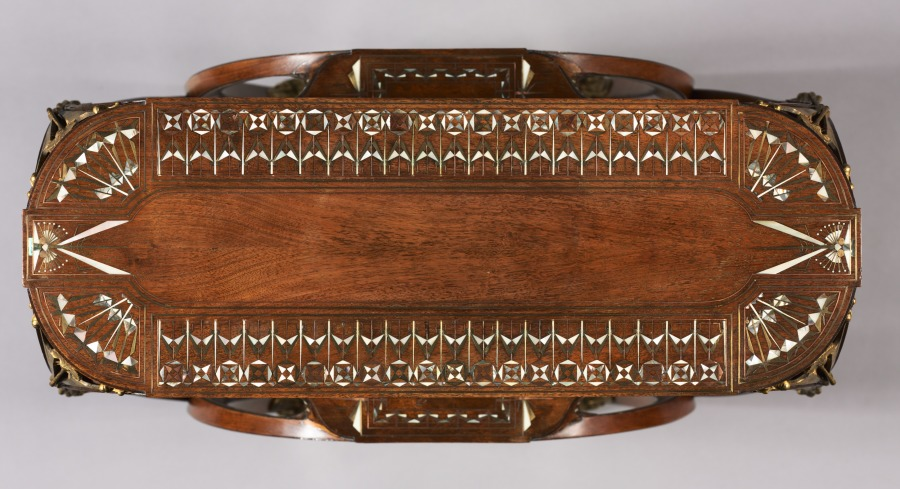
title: Tea Table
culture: France, Paris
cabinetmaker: Carlo Bugatti (Italian, 1856–1940)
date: c. 1907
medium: inlaid wood (mahogany?), cast and gilded bronze mounts, inlays of ivory or bone, metal, and mother-of-pearl (marine mussels or pearl oysters)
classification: Furniture and woodwork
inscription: signed in ligature in white metal inlay on central shelf: Bugatti.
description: Luxurious materials might catch the eye first, but a closer look reveals the imaginary creatures that adorn the surface of this table. Featuring elaborate arches, a favorite motif that appeared throughout Bugatti's furniture, this fantastical imagery is a window into the designer's expressive imagination.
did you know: Carlo Bugatti's sons achieved illustrious careers of their own. Rembrandt Bugatti (1884-1916) became a celebrated sculptor, and Ettore Bugatti (1881-1947) manufactured luxurious automobiles and racing cars.